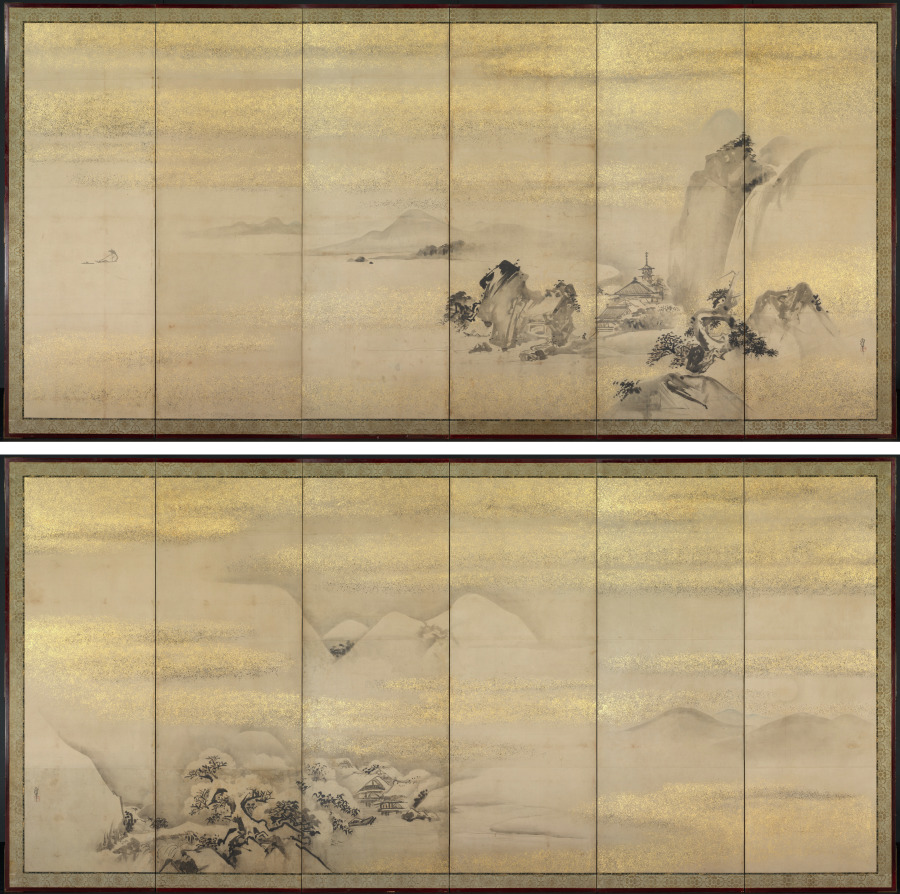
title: Summer and Winter Landscapes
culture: Japan, Edo period (1615–1868)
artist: Kano Naonobu (Japanese, 1607–1650)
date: 1600s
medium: pair of six-panel folding screens; ink on gold- and silver-decorated paper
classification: Painting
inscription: signed: "Jitekisai Naonobu"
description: This sparse composition depicts a summer scene on the right and a winter scene on the left. Careful observation reveals that the pair of screens was once damaged, and a later conservation including new sections of paper and inpainting sought to preserve the original flavor of the paintings so they could continue to be appreciated. Kano Naonobu was born in Kyoto, the younger brother of major painter and authenticator Kano Tan’yū (1602–1674). He relocated to Edo (present-day Tokyo) at the behest of the Tokugawa government in 1630 where he worked with his brother and teacher. In Kyoto, he helped his brother with paintings for Nijō Castle and the major Pure Land Buddhist temple Chion’in.